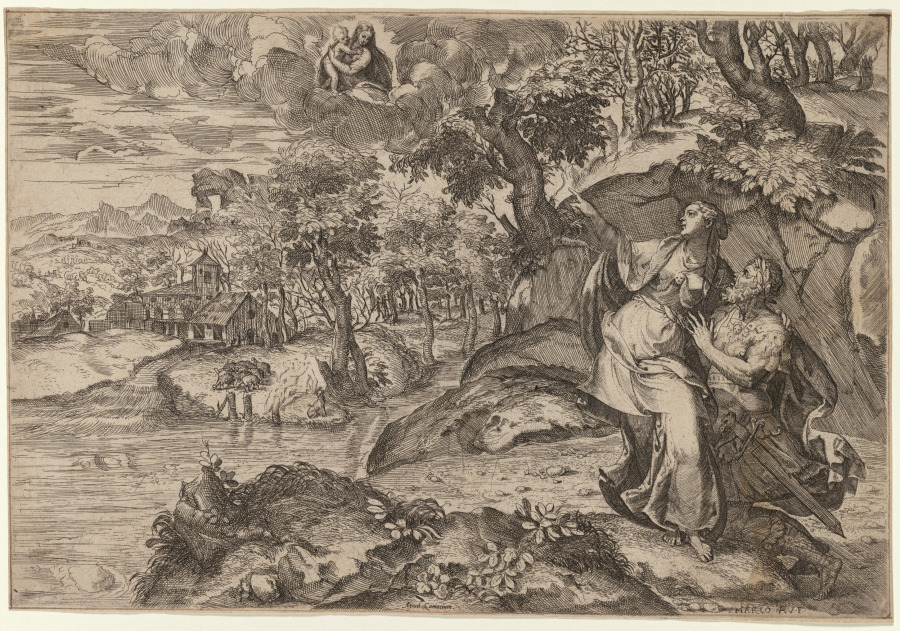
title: Augustus and the Tiburtine Sibyl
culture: Italy, 16th century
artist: Marco Angolo del Moro (Italian, c. 1537–d. after 1586)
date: 1570s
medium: Etching with engraving on paper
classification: Print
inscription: Imprinted in lower center on recto: “Apud Camocium”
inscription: Imprinted in lower right on recto: “MARCO A-V-F”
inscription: In graphite on verso: “3”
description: The Roman Emperor Augustus and the Tiburtine Sybil (a Roman prophetess) embrace in a lush landscape. A 12th-century legend told that Augustus consulted the sybil to ask if he should be deified after his death. He received a vision of the Virgin and Child, depicted above, which swayed him away from his pagan beliefs. Del Moro’s effortless blend of narrative and landscape was typical of works by artists from the region around Venice.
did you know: The story portrayed in this etching was understood as a turning point from paganism to Christianity during the Roman era.